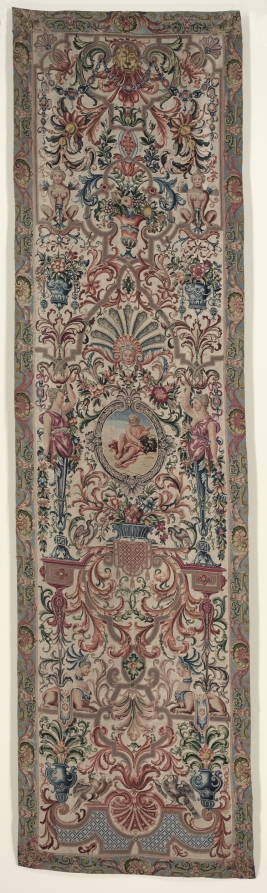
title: Needlework Bed Hanging (2 of 2)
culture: France, late 17th century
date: c. 1690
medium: petit point embroidery; silk and wool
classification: Embroidery